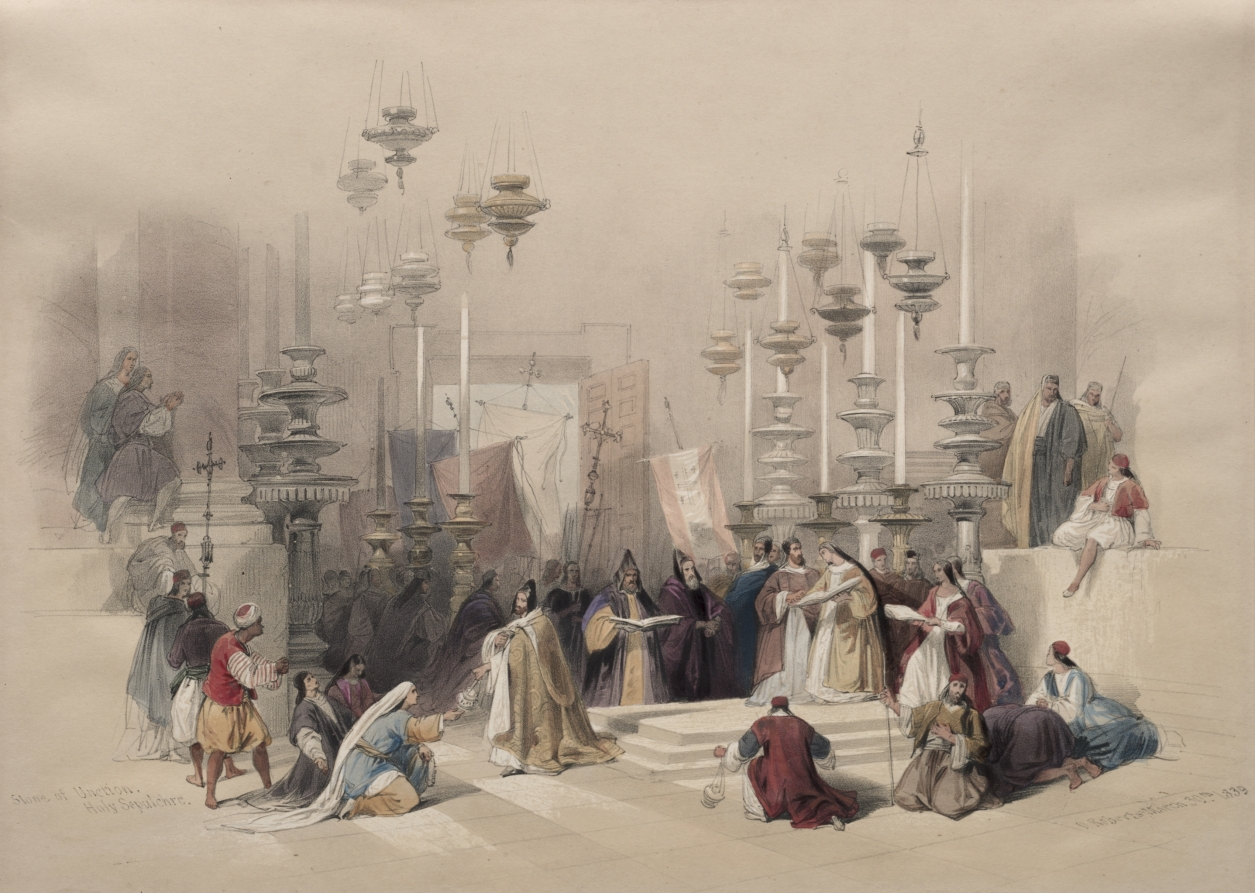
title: Stone of Unction, Holy Sepulchre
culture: England, 19th century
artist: David Roberts (Scottish, 1796–1864)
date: 1839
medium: color lithograph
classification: Print